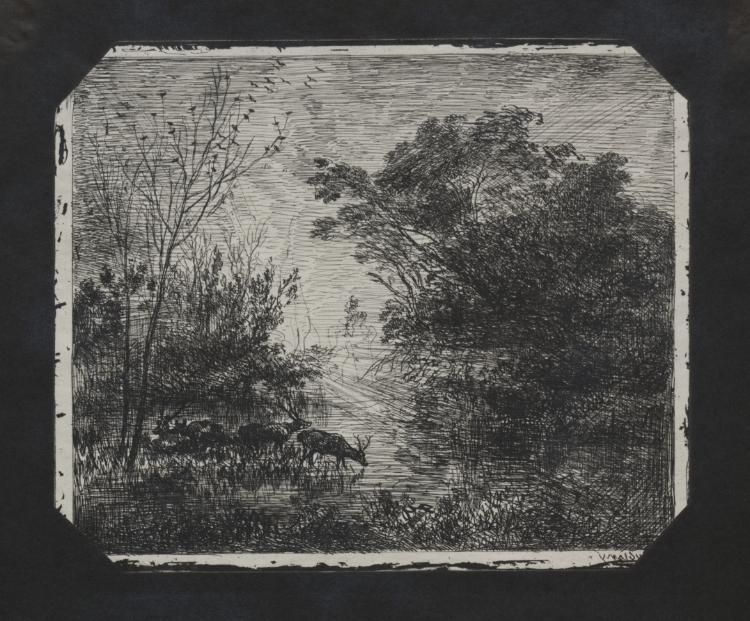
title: The Deer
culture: France, 19th century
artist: Charles François Daubigny (French, 1817–1878)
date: 1862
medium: cliché-verre plate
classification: Plate